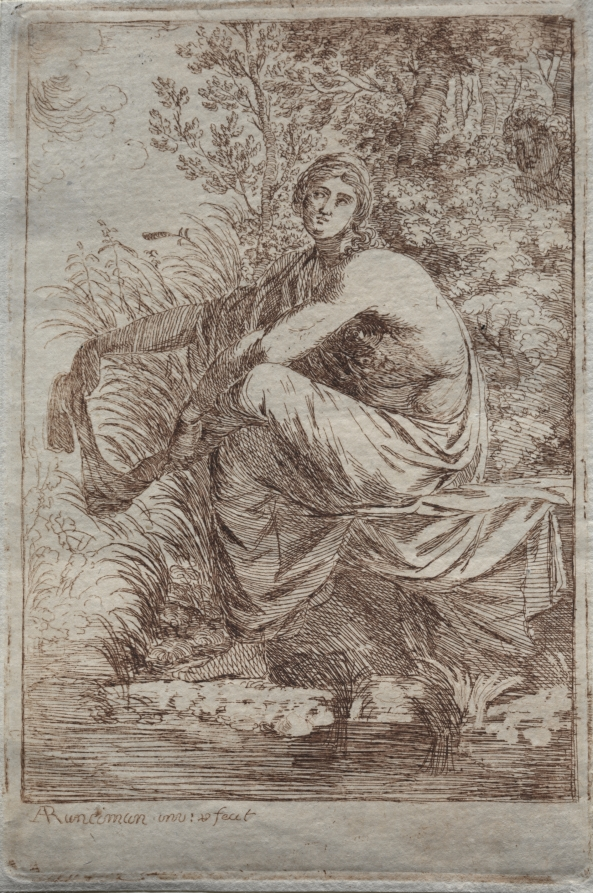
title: Musidora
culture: England, 18th century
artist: Alexander Runciman (British, 1736–1785)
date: c. 1775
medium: etching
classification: Print